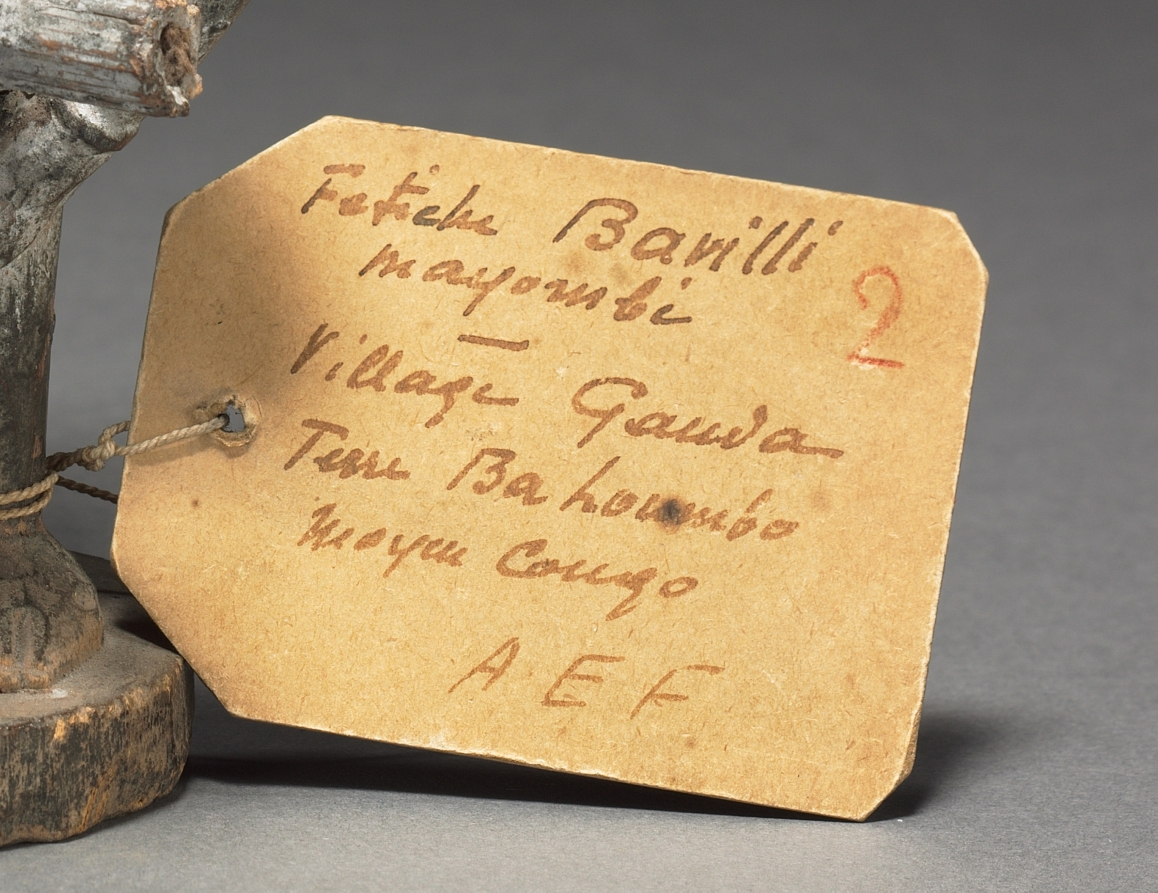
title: Power figure (nkisi)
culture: Central Africa, Republic of the Congo, Kongo people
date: late 1800s-early 1900s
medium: Wood, organic materials (including resin), probably kaolin, and metalized glass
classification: Sculpture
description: This figure is of the nduda type, characterized by the attached "guns" loaded with gunpowder and used to shoot witches. It is the only figure that adopts the threatening pose: the right hand raised, holding a spear or knife, and the left hand resting on the hip. Two guns protrude horizontally on both sides of the cylindrical medicine pack on the belly, covered with a round piece of mirror.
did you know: This is the only figure in a group of seven found in a French antique shop adopting a threatening pose.